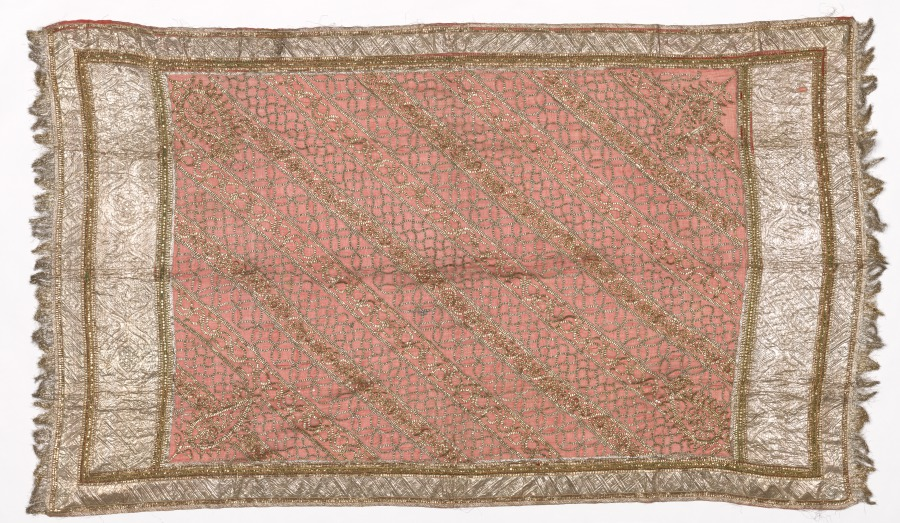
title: Embroidered Sari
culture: India, Patna, 19th - early 20th century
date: 1800s - early 1900s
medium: embroidery; silk and metal thread and sequins on cotton tabby ground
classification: Embroidery